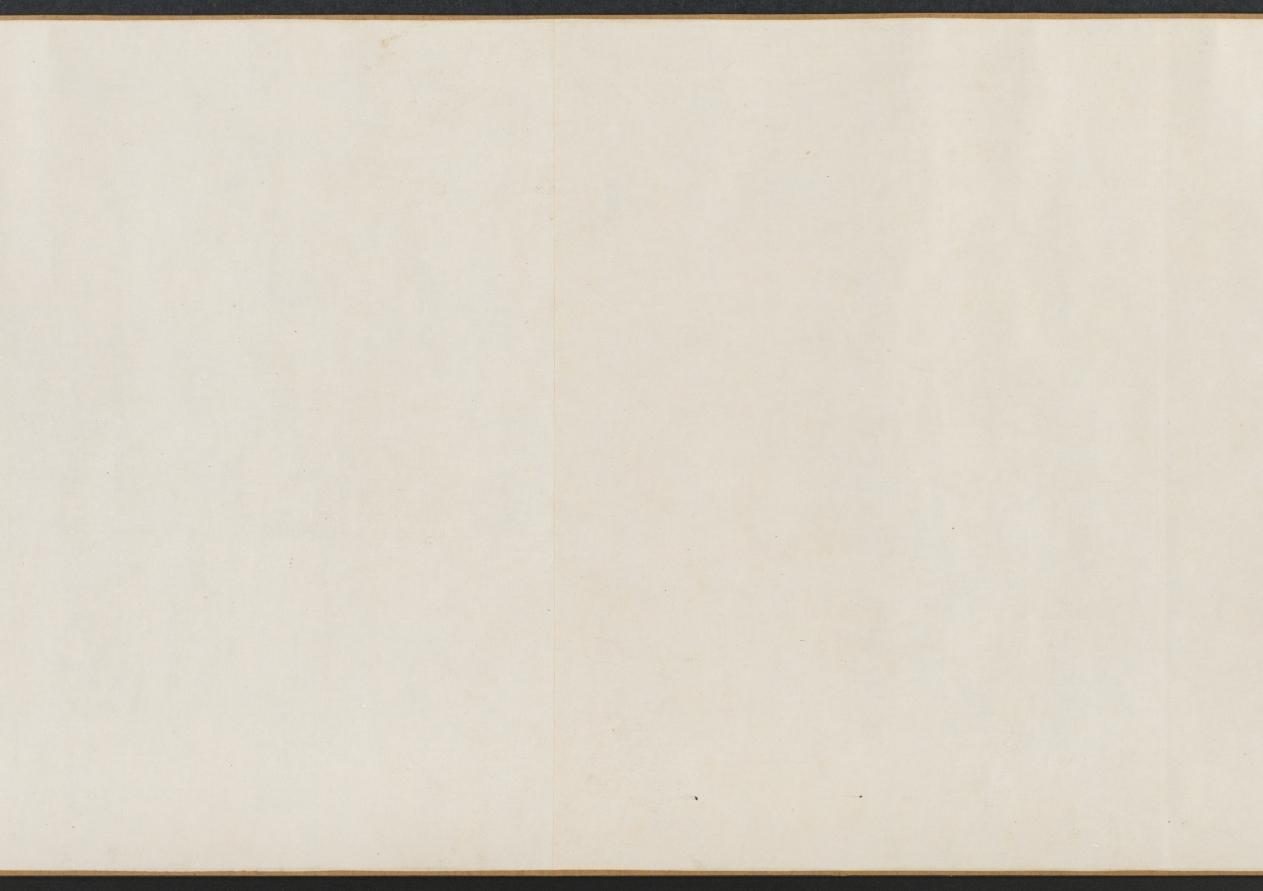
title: The Nine Elders of the Mountain of Fragrance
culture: China, Ming dynasty (1368–1644)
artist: attributed to Xie Huan (Chinese, c. 1370-c.1450)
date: 1426–52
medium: handscroll, ink and color on silk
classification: Painting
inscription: 4 seals: 2 of Xiang Yuanbian 項元汴 (1525–1590); 1 of the Qianlong Emperor (r. 1736-95); 1 of C. C. Wang 王季遷 (1907–2003)